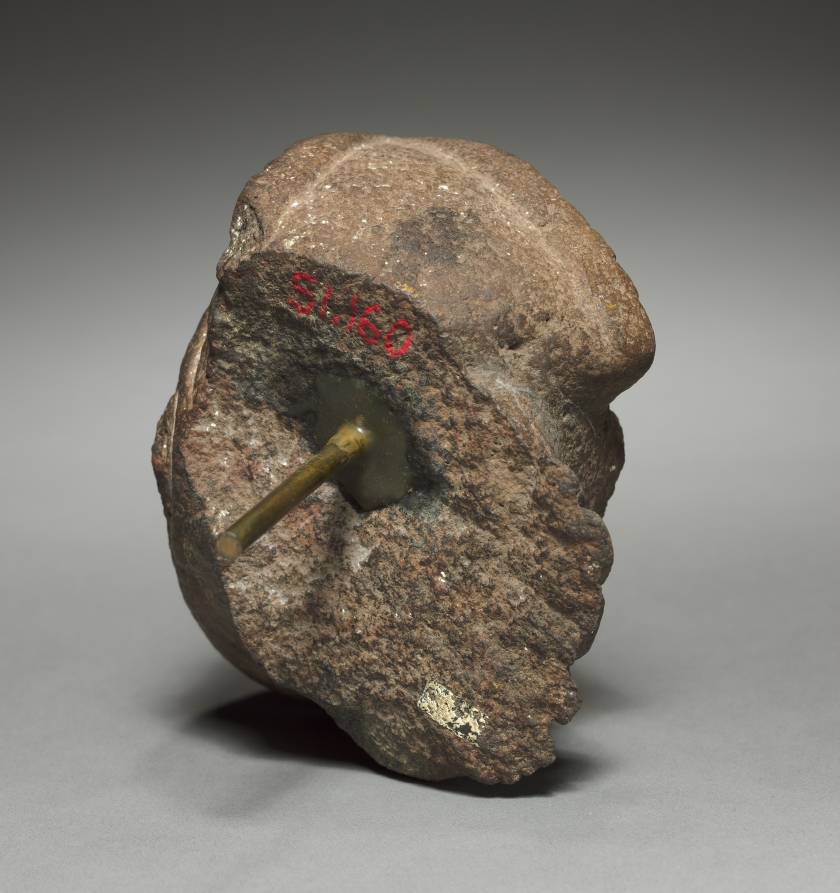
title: Head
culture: Mexico, Classic Veracruz (Totonac or Tajin)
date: 600–1100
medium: stone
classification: Sculpture